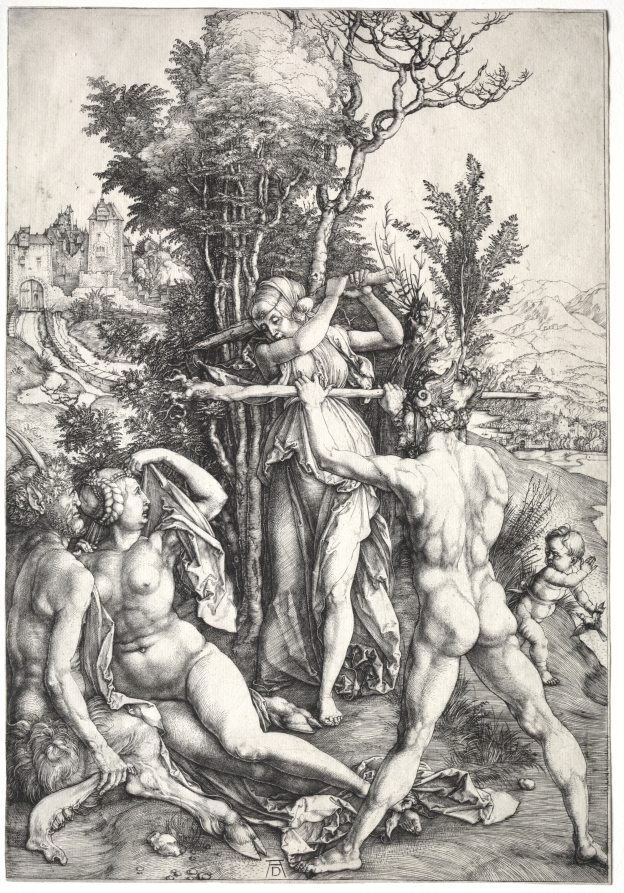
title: Hercules at the Crossroad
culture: Germany, late 15th-early 16th century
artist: Albrecht Dürer (German, 1471–1528)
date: c. 1498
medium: engraving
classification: Print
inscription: Watermark: Meder 20 High Crown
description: In his journal, Albrecht Dürer referred to this enigmatic engraving as “the Hercules,” but the image is not a typical representation of the mythological hero’s 12 labors. The subject derives from a Greek parable, where Hercules decides between a life of pleasure or one of virtue. The moral dispute plays out here as a battle between two personifications, Virtue, wielding a club, and Pleasure, lying with a satyr. Hercules’s crossroad is a copse of trees between two paths: the ascent to civilization at left (pleasure?), or the winding river to the wilderness at right (virtue?).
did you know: The rooster on the helmet of Hercules in this image may symbolize the hero's valor.